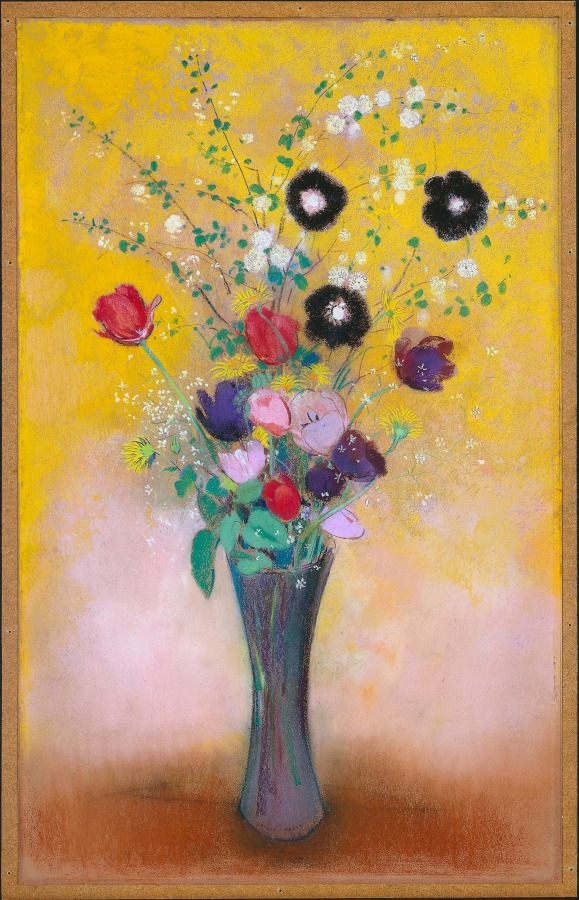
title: Vase of Flowers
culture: France, 20th century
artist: Odilon Redon (French, 1840–1916)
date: 1916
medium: pastel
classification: Drawing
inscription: signed on base of flower: ODILON REDON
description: Inspired by Cleveland’s groundbreaking acquisitions of Odilon Redon’s artworks during the 1920s, local philanthropist and collector Leonard C. Hanna Jr. purchased this luminous pastel of a floral still life in 1937. Hanna acquired it from Jacques Seligmann, a dealer based in New York City and Paris who was fundamental in bringing 19th-century French art to American audiences. In 1939, Hanna loaned the pastel to the New York World’s Fair, where it represented Redon’s work. Those who saw it there were attracted to the vivid color and timeless subject, which preoccupied the artist at the end of his life.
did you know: Redon was inspired to depict flowers after meeting the botanist Armand Clavaud, a cataloguer of plant species in the artist's native region of Bordeaux